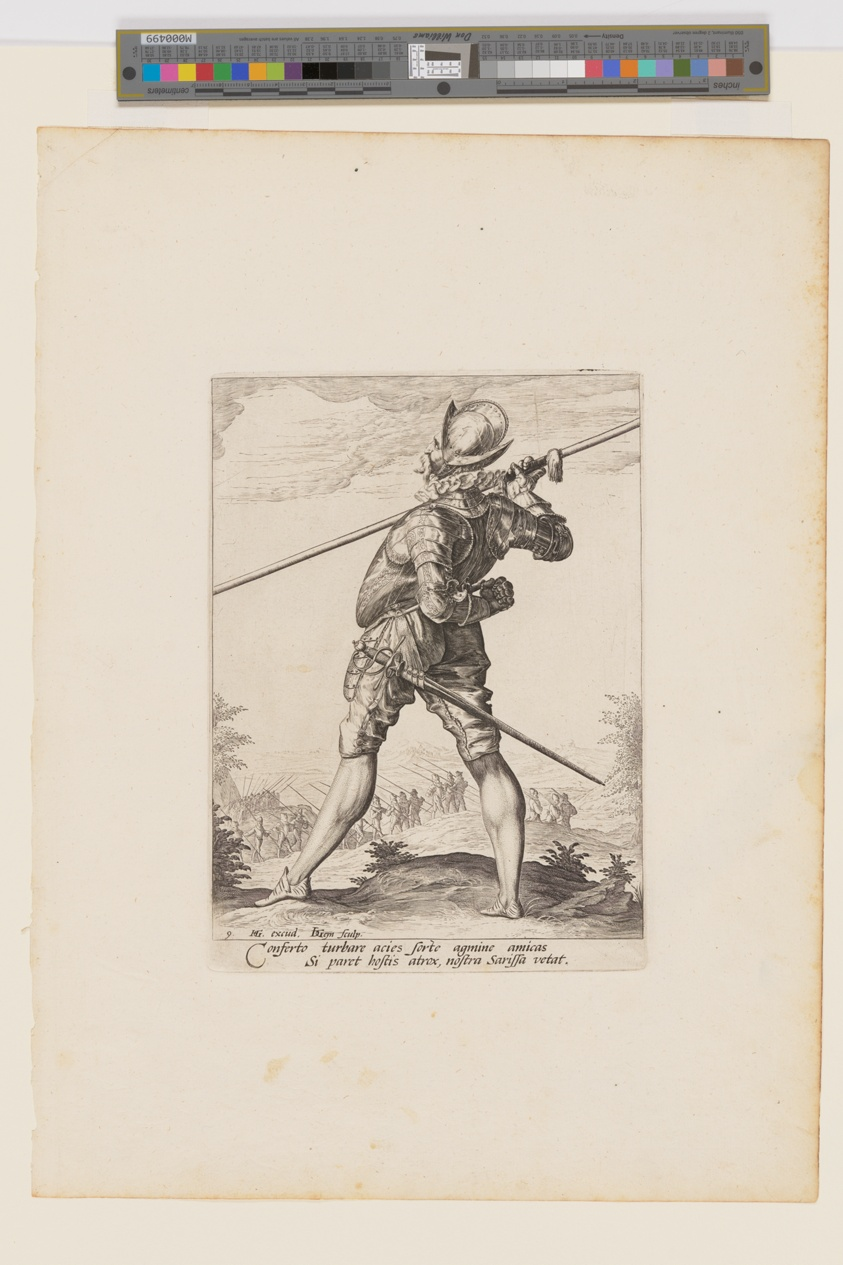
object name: Print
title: Pikeman, from Officers and Soldiers of the Bodyguard of Emperor Rudolph II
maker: Jacques de Gheyn II (Dutch, 1565–1629); after Hendrick Goltzius (Dutch, 1558–1617)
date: 1587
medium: Engraving on ivory laid paper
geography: Netherlands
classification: engraving; paper; print; prints and drawing